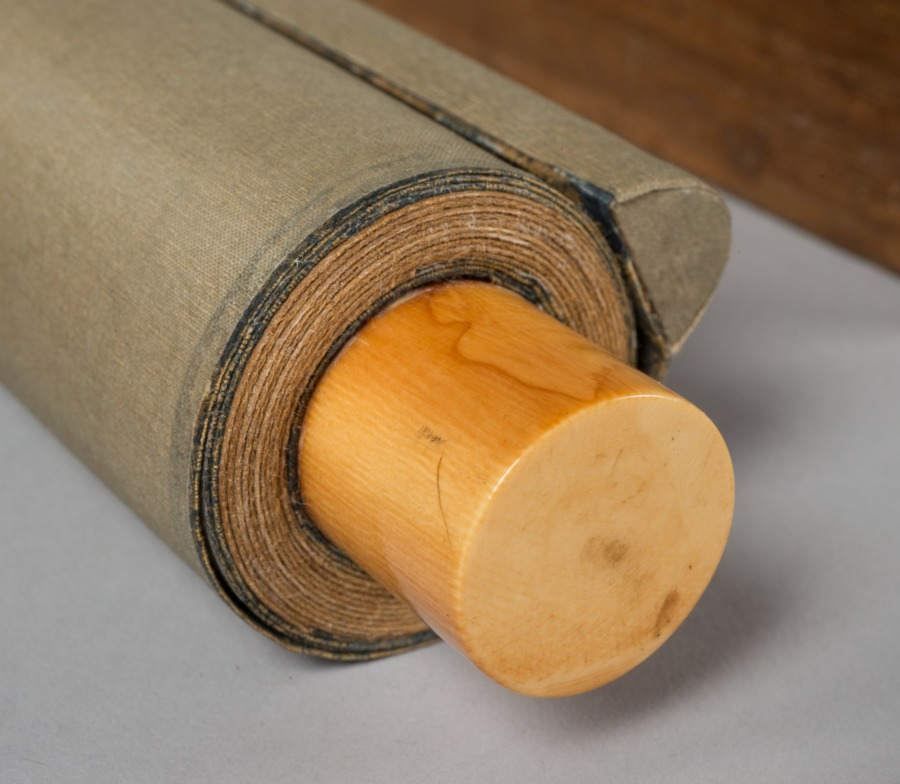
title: Emperor Minghuang Teaching Yang Gueifei to Play the Flute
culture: Japan, Muromachi period (1392–1573)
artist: Choryusai (Japanese)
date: late 1400s–early 1500s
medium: hanging scroll; ink and color on paper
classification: Painting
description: Minghuang, a prominent emperor of Tang (618-906) China and his consort, Yang Gueifei, have inspired many legends, paintings, and poetry in later Chinese culture. Through the study of Chinese literature and the collecting of Chinese paintings, tales of their lives and romance became well-known in Muromachi Japan.